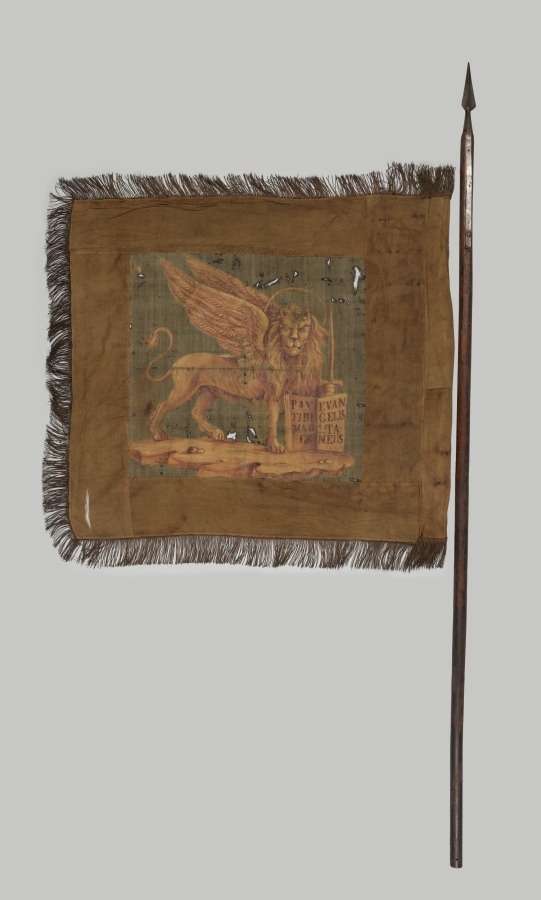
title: Banner With the Lion of St. Mark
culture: Italy, Venice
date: late 1600s - early 1700s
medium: brown silk with fringe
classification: Textile